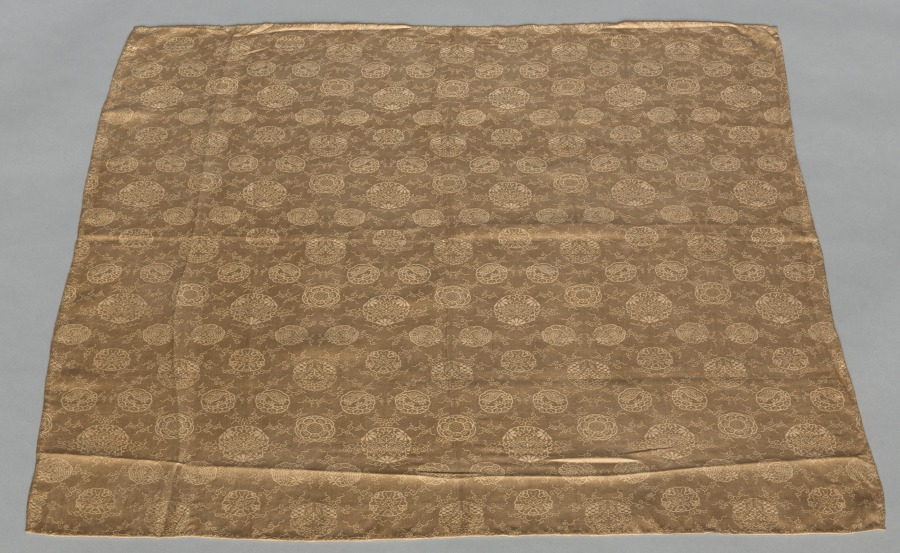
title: Fragment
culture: China, 19th century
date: 1800s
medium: silk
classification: Textile